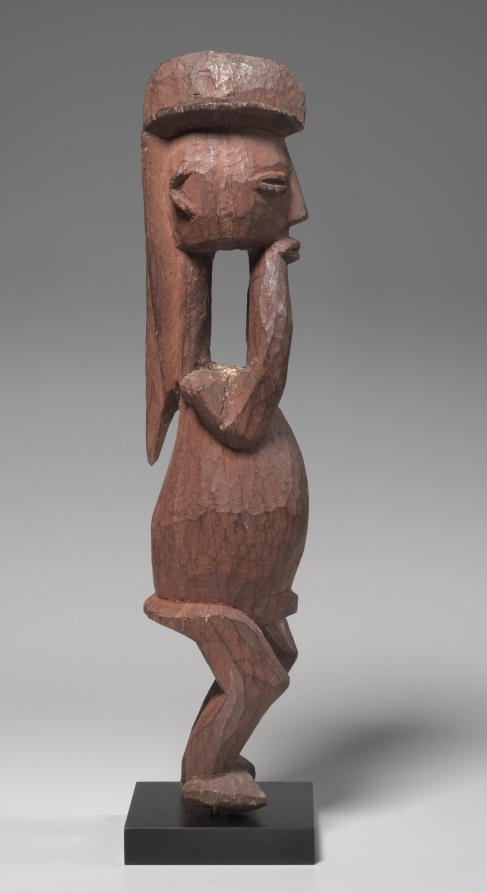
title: Male Figure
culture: Africa, Central Africa, Democratic Republic of Congo, Hungaan-style maker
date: mid- to late 1800s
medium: Wood and colorant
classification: Sculpture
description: Hungaan figures of this size served as guardians of ritual shrines and functioned in rituals to promote fertility, guarantee well-being, and ensure longevity. The striking crested hairstyle imitates a real coiffure or a wig, indicative of status and prestige. The hands supporting the chin identify the figure as a chief who is immersed in thought and contemplation, pondering over his responsibilities.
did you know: The red powdery surface of this figure mimics a red body adornment that mixed ground camwood with palm oil.